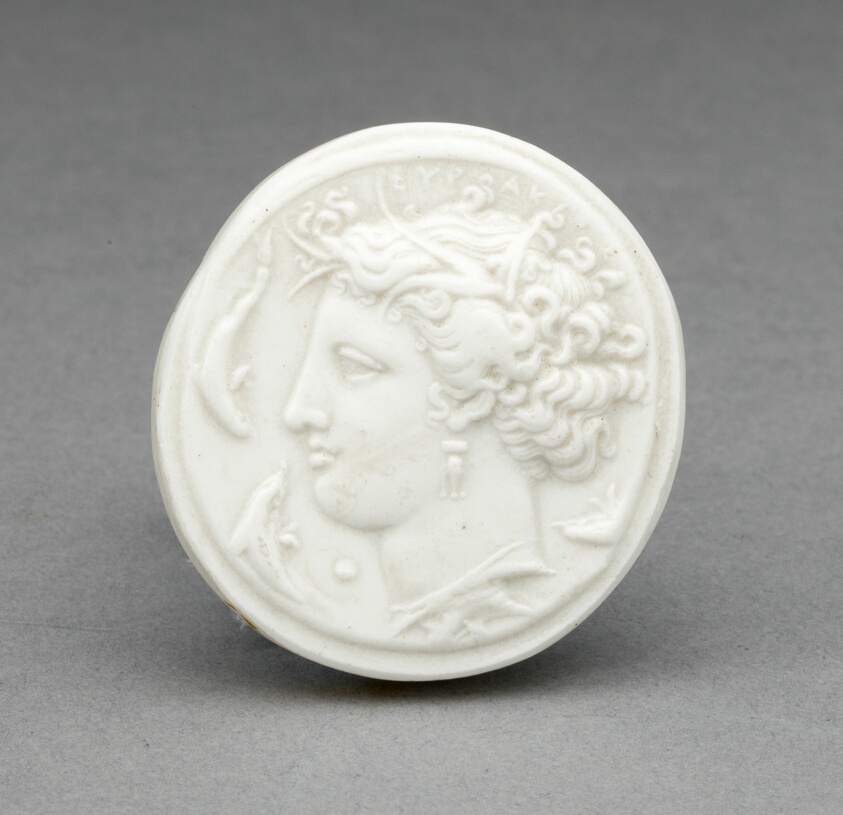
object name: Ceramics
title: Medallion with Arethusa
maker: Wedgwood Manufactory (England, founded 1759)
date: Early 19th century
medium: Stoneware (jasperware)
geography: Burslem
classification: sculpture; stoneware; european decorative arts; ceramics